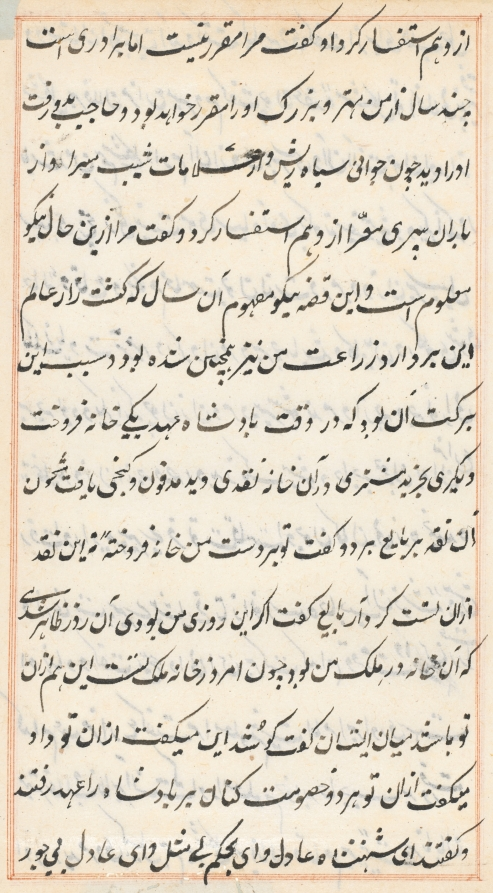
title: Page from Tales of a Parrot (Tuti-nama): text page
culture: Mughal India, court of Akbar (reigned 1556–1605)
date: c. 1560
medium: gum tempera, ink, and gold on paper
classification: Painting